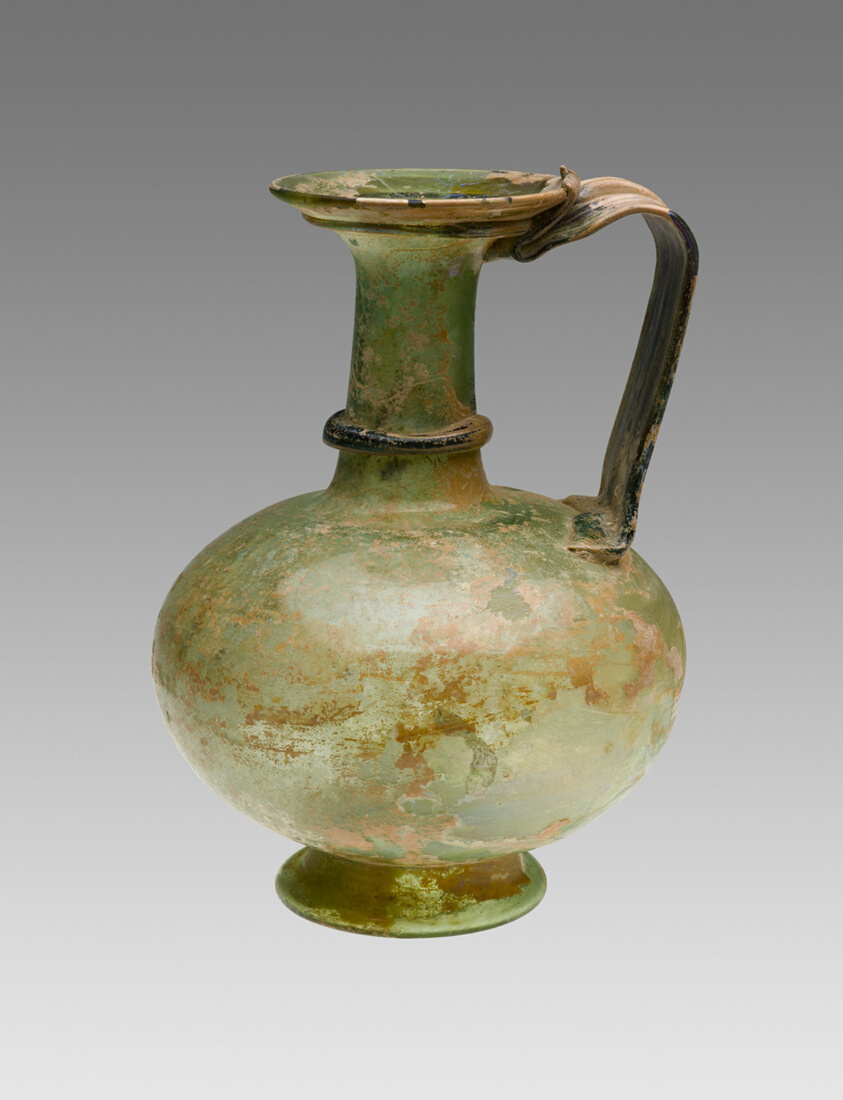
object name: Vessel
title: Pitcher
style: roman (ancient, style or period), syrian, ancient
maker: Roman; coast of Syria or Palestine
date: 3rd-4th century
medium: Glass, blown technique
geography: Syria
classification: pitcher (vessel); glass; vessel; ancient art; container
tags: dining, drinking